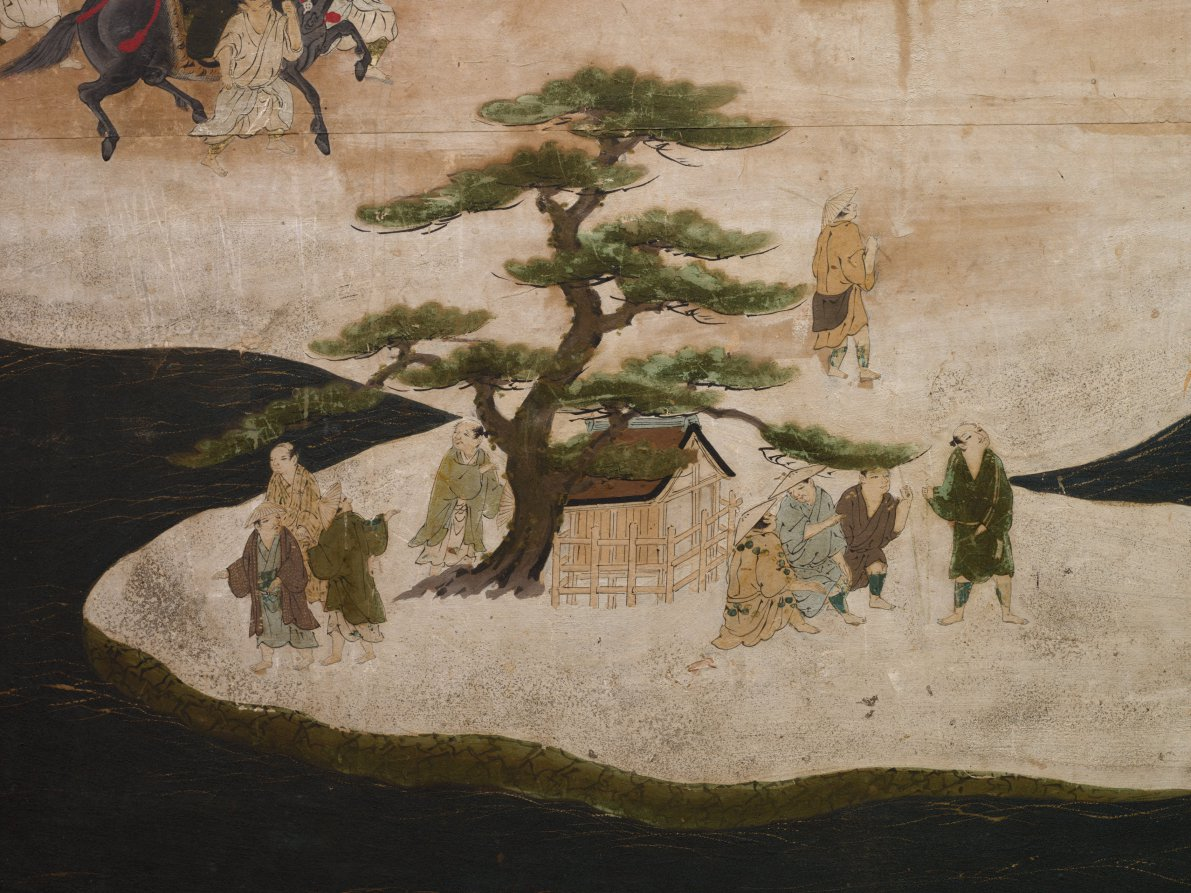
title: Famous Views of Ōmi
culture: Japan, Edo period (1615–1868)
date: 1660s–90s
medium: One of a pair of six-panel folding screens; ink, color, and gold on gilded paper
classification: Painting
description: Ōmi is an area around Lake Biwa near Kyoto. The Shinto shrine Hiyoshi Taisha and the Buddhist temple Ishiyamadera are in the upper right and upper left of the composition, respectively. At center is the pilgrimage route and people in the town before the temple gates. Harvested rice fields to the right and flowering cherry blossom trees at left show seasonal change from winter to spring.